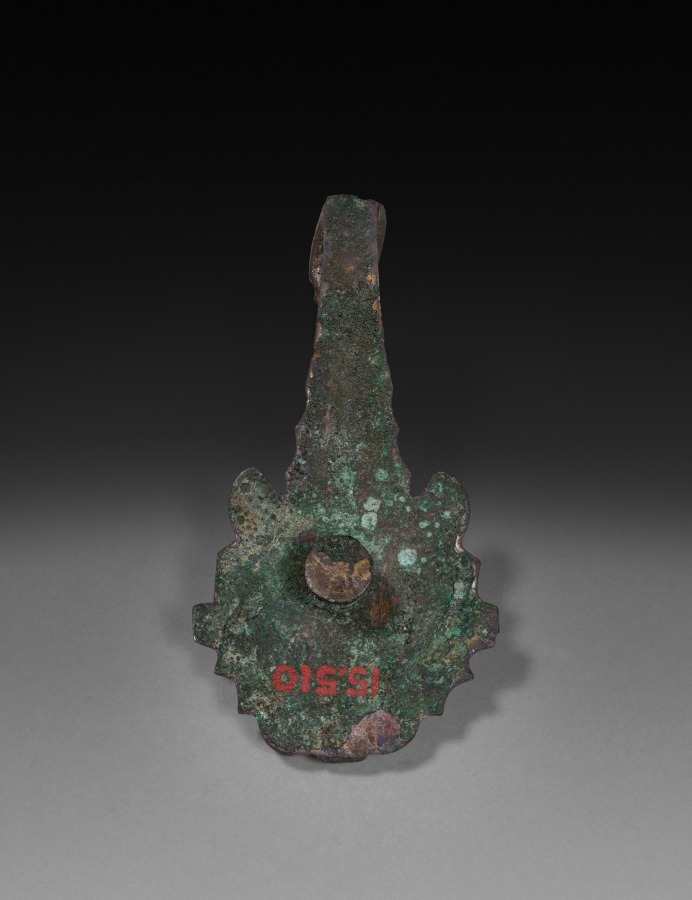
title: Garment Hook (Daigou)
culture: China, Eastern Zhou dynasty (770–256 BCE), Warring States period (475–221 BCE)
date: 475–221 BCE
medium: gilt bronze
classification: Metalwork